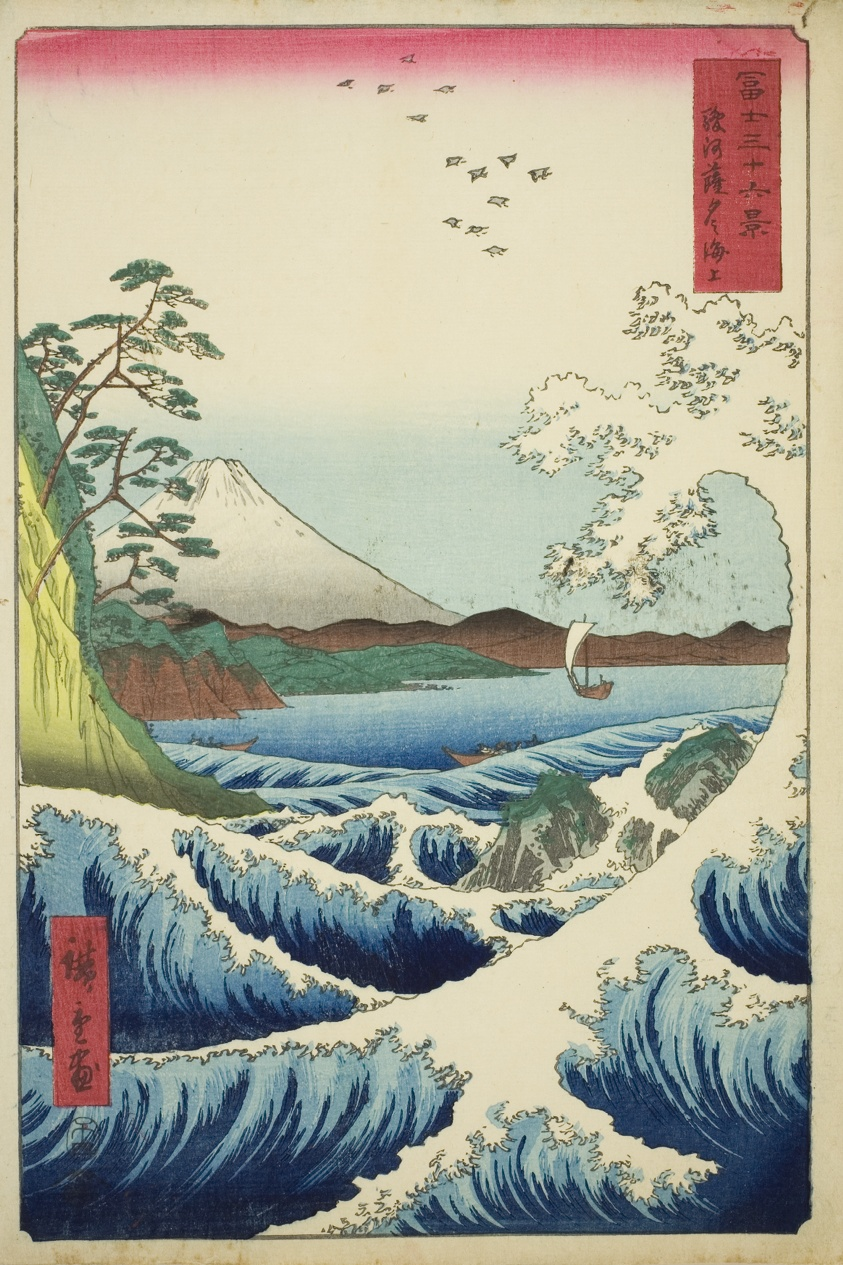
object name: Print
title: The Sea off Satta in Suruga Province (Suruga Satta kaijo), from the series "Thirty-six Views of Mount Fuji (Fuji sanjurokkei)"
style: Japanese (culture or style)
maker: Utagawa Hiroshige 歌川 広重; Japanese, 1797-1858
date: 1858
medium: Color woodblock print; oban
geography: Japan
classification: print; asian art